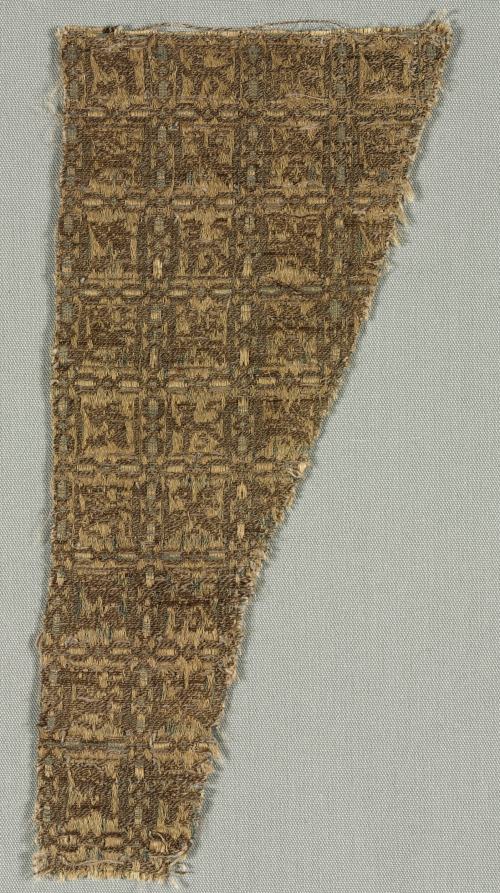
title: Lampas with animals in squares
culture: probably Iran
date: late 1200s - 1300s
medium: lampas and taqueté: silk and metal thread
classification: Textile